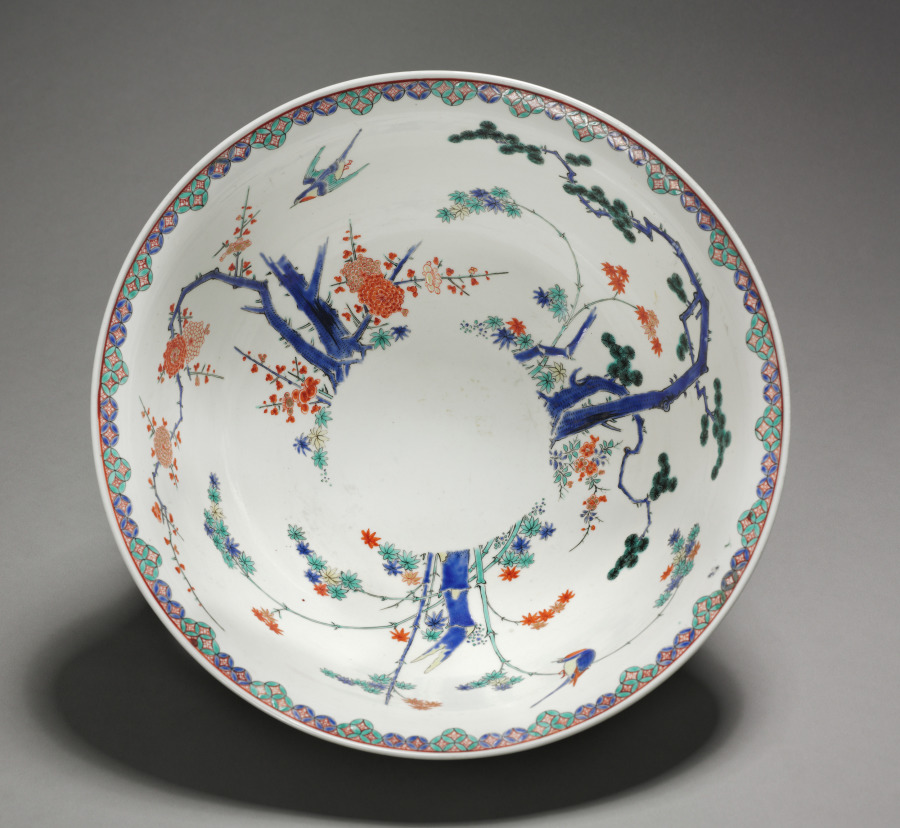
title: Bowl: Kakiemon Ware (2 of 2)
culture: Japan, Edo period (1615–1868)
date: late 1600s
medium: porcelain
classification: Ceramic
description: The Chinese style of decoration identifies this bowl as a product made for the markets in England, Holland, France, and Germany. Here, kakiemon potters rearranged the Chinese literati motifs of the plum, pine, and bamboo. Such kakiemon ware inspired domestic porcelain production in Europe in the 18th and 19th centuries.